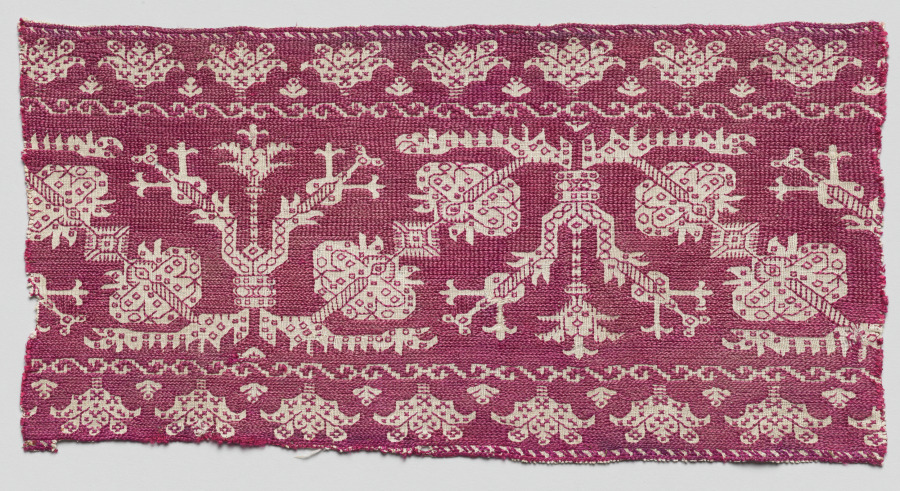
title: Fragment of a furnishing textile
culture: Africa, North Africa, Morocco, Azemmour, Moroccan embroiderer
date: 1800s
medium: Linen, silk, dye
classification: Embroidery